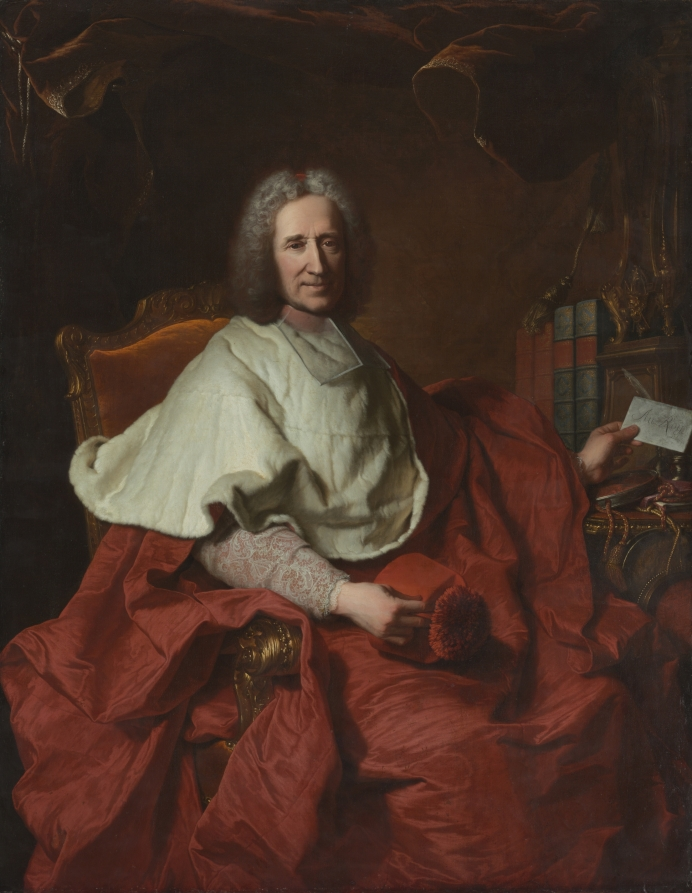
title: Portrait of Cardinal Guillaume Dubois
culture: France, 18th century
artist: Hyacinthe Rigaud (French, 1659–1743)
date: 1723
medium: oil on canvas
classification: Painting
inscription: signed on base of clock: fait par Hyacinthus Rigaud, 1723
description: With his luxurious, flamboyant dress—a voluminous wrap of scarlet silk topped by a short fur cape—the subject of Hyacinthe Rigaud’s portrait was clearly a man of consequence. Guillaume Dubois gained the favor of Louis XIV as tutor to his nephew, Philippe Charles, Duke of Orléans, and served as chief minister under Louis’s successors, the regent Duke of Orléans and Louis’s great-grandson, Louis XV. Dubois was appointed a Cardinal in the Catholic Church in 1721, a lofty aspiration at least partly motivated by political ambition: the title gave him the ability to remove political adversaries with impunity. Dubois holds a letter with the words Au Roy (to the king); this portrait was painted in the same year the young Louis XV ascended to the throne.